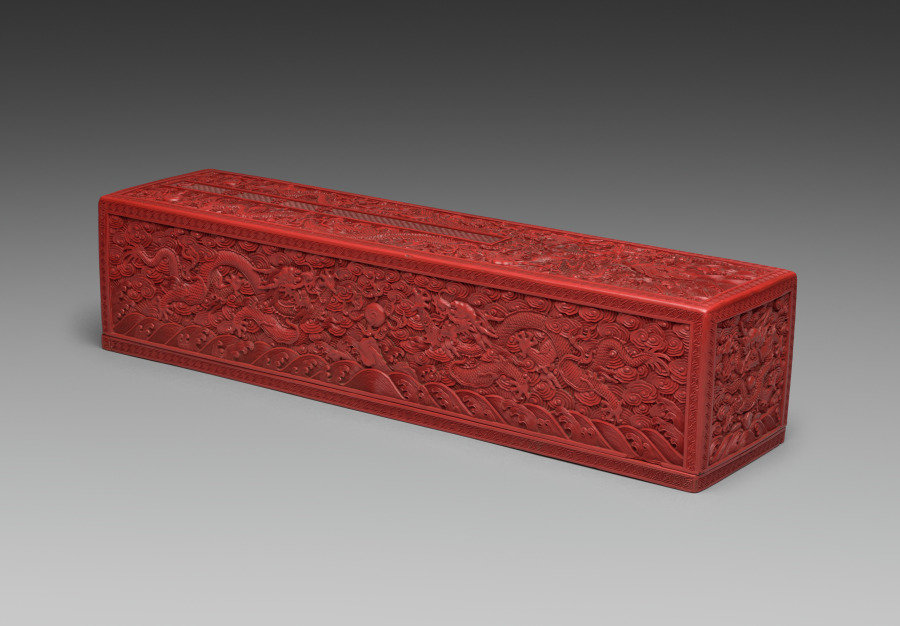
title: Carved Lacquer Scroll Box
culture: China, Qing dynasty (1644–1911), Qianlong reign (1736–95)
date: 1736–95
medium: Red carved lacquer on wood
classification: Lacquer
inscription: 心寫治平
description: The elaborate design, superior craftsmanship, and inscription carved into the red cinnabar lacquer proclaim the imperial pedigree of this scroll box. On either end is a five-clawed dragon, a design reserved only for an emperor. More dragons twist and wind through swirling clouds and waves along the length of the box’s sides and top. The carving is intricate and vigorous, while the design is controlled and regular. This box housed the private portraits of the Qianlong Emperor, his empress, and 11 other favorites among his presumed 40 or more wives during his 60-year reign. It was commissioned to be made in Suzhou when no more portraits were added to the scroll. An entry in the imperial workshop records relates to the Cleveland box. It states that in 1787, a box design with a dragon pattern, including the inscription, In his heart is envisioned a peaceful reign, was sent to a Suzhou workshop. Imperial portraits were collected in the Chonghua Palace in the Forbidden City, and the emperor’s portrait was kept in this red lacquer box from Suzhou.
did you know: This is the original box for the handscroll Portraits of the Qianlong Emperor and His Twelve Consorts, CMA 1969.31.